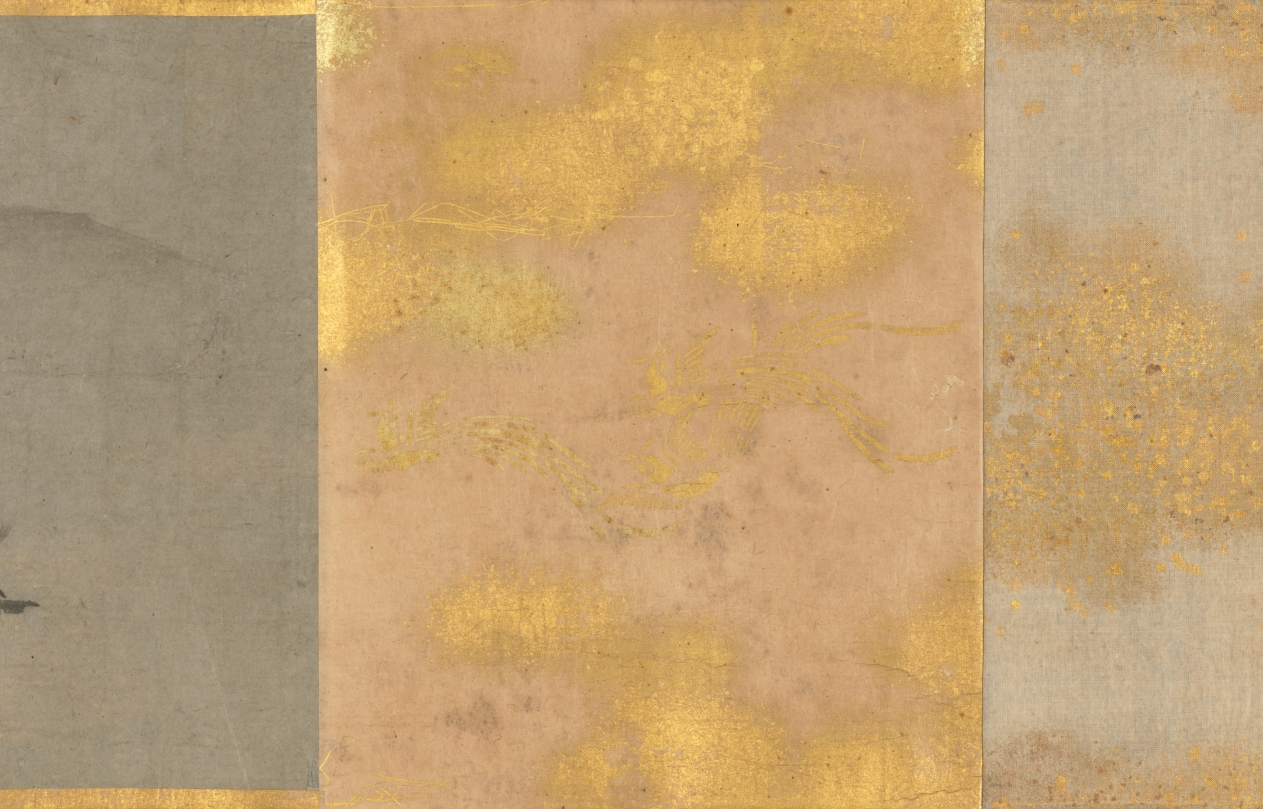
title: Eight Views of Xiao-Xiang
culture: Japan, Muromachi period (1392–1573)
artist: Sesson Shūkei (Japanese, c. 1492–c. 1577)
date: 1500s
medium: handscroll; ink on paper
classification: Painting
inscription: Signature and seal of artist at end of painting.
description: Eight Views of the Xiao and Xiang Rivers can be traced to 11th-century Chinese poems and paintings, the depiction of which had also become popular among Korean and Japanese painters. Xiao-Xiang refers to the region in present-day Hunan province where the Xiao and Xiang rivers converge. Few painters of the Eight Views had in fact seen the scenery; rather, they were trying to portray in ink and wash the lyrical qualities of dim light and a misty atmosphere typical of that region. Each of the poetic titles suggests a time of day, a season, or specific atmospheric conditions—subjects that challenged the abilities of the most talented artists. In this miniature painting (shukuzu) of the Muromachi period, Japanese Zen monk and painter Shukei Sesson depicted all eight views featured in Chinese prototypes: Wild Geese Descending to Sandbar; Returning Sails Off a Distant Coast; Mountain Market in Clearing Mist; River and Sky in Evening Snow; Autumn Moon over Dongting Lake; Night Rain on the Xiao and Xiang; Evening Bell from Mist-Shrouded Temple; and Fishing Village in Evening Glow.